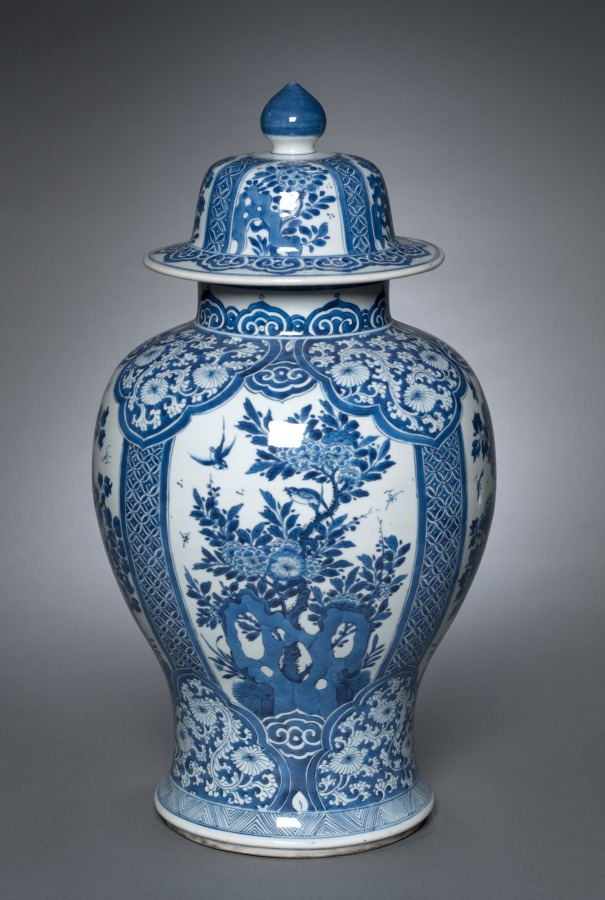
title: Vase with Cover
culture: China, Jiangxi province, Jingdezhen kilns, Qing dynasty (1644–1911), Kangxi reign (1662–1722)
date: 1662–1722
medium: porcelain with underglaze blue decoration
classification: Ceramic